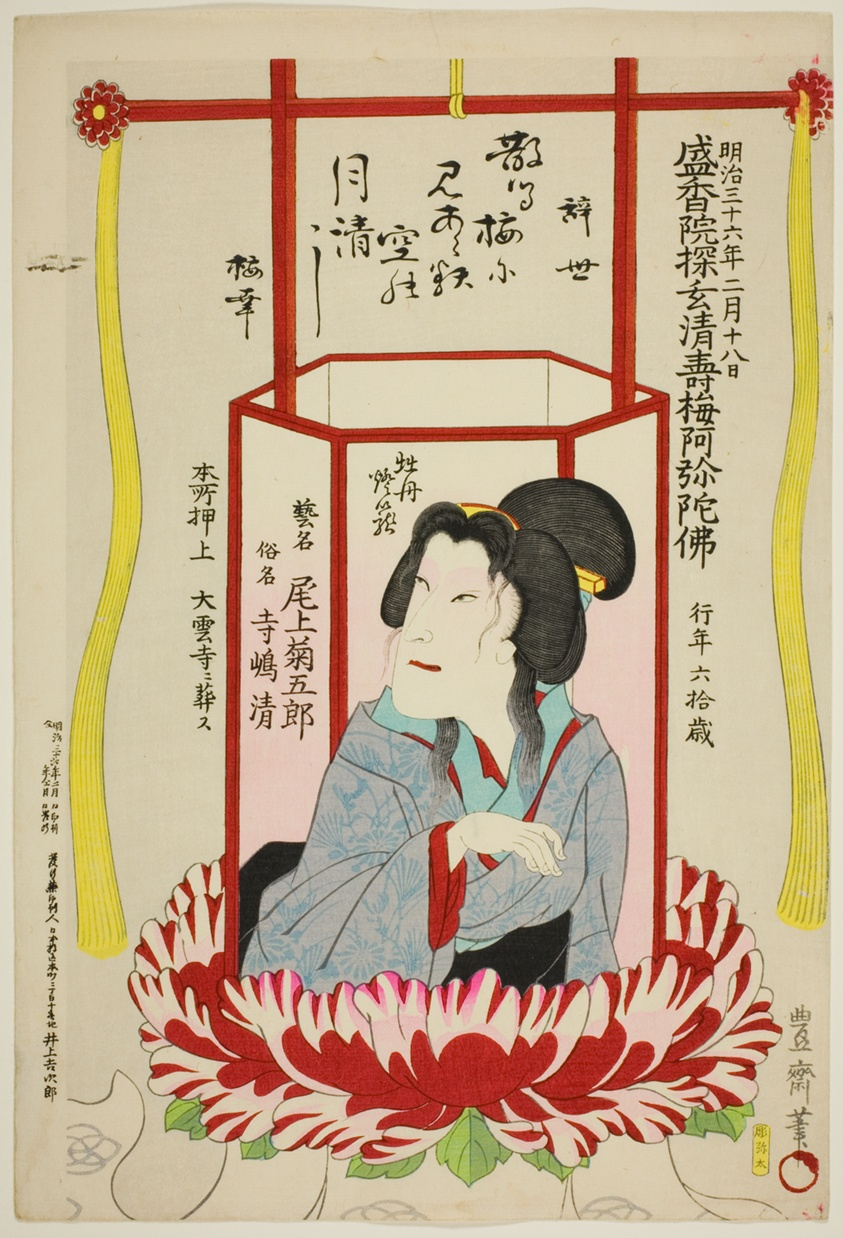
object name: Print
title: Memorial Portrait of the Actor Onoe Kikugoro V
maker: Utagawa Kunisada III (Kunimasa IV, Toyokuni V) (Japanese, 1848-1920)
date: 1903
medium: Color woodblock print; oban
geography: Japan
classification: print; asian art